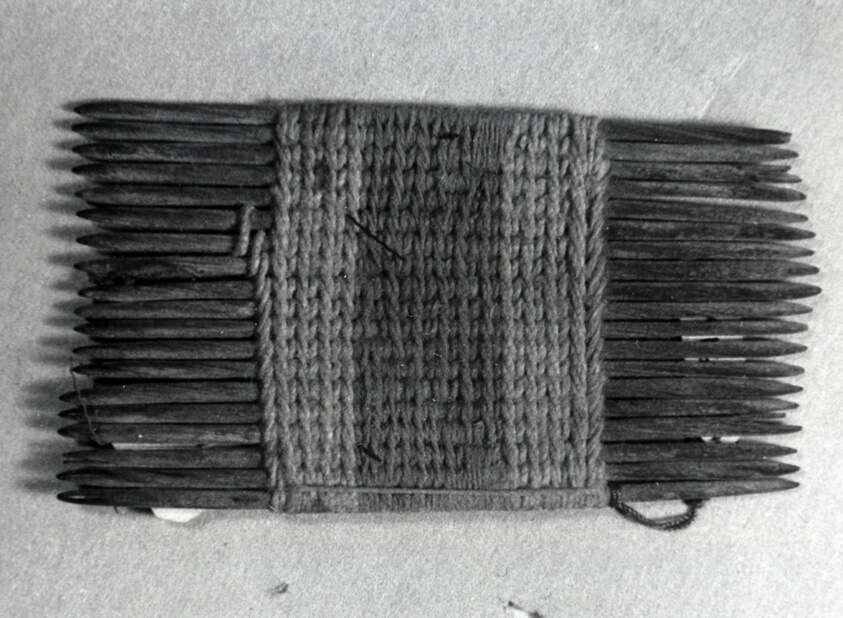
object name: Costume and Accessories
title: Comb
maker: Peru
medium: Double comb; flexible; tan and brown weaving in center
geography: Peru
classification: textile; textile working equipment; weaving; accessories (object genre); costume